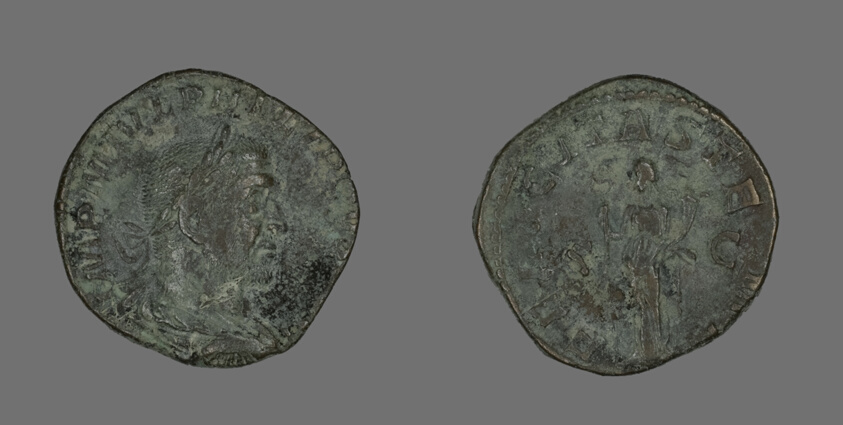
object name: Coin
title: Coin Portraying Philip the Arab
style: roman (ancient, style or period), ancient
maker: Roman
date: 244-249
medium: Bronze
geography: Roman Empire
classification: coin; ancient art